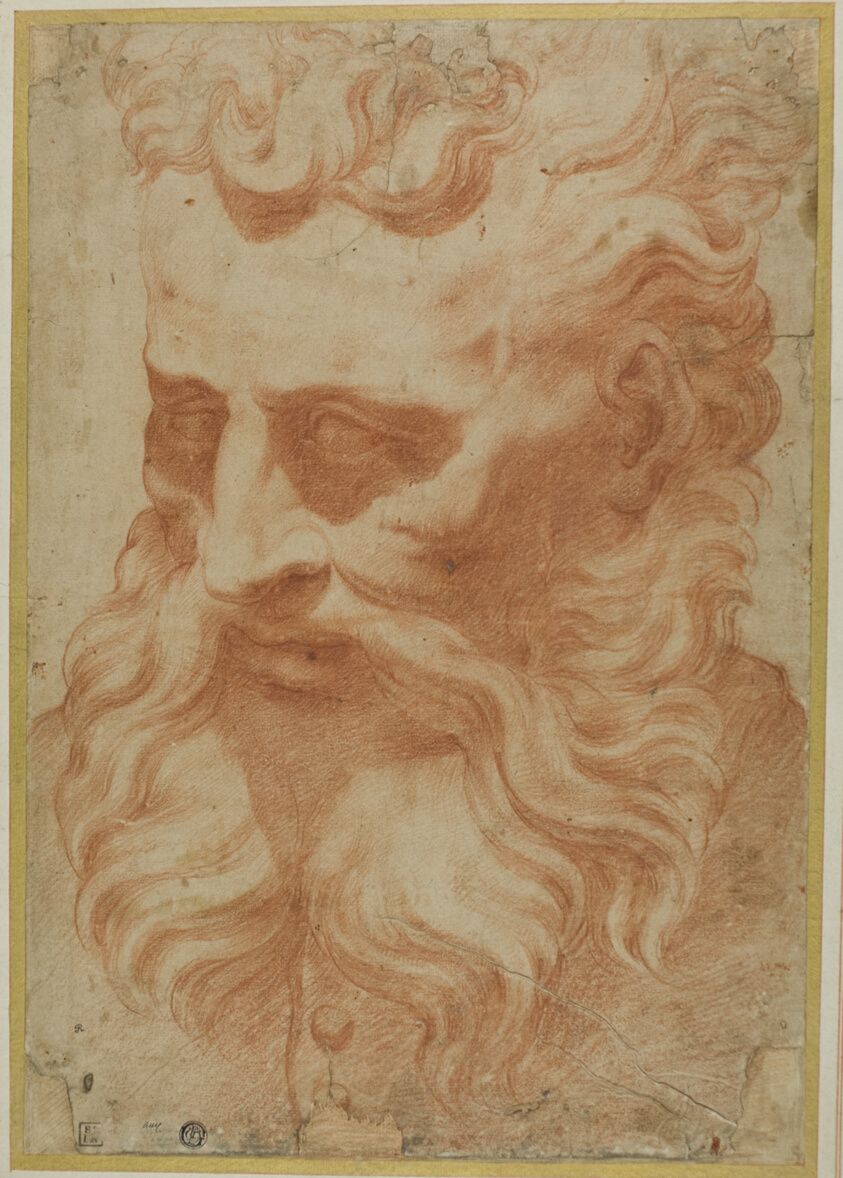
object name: Drawing and Watercolor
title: Death of Adonis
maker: Giulio Pippi, called Giulio Romano, after; Italian, c. 1499-1546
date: c. 1530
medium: Red chalk on cream wove transparentized paper (pieced together), laid down on cream laid paper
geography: Italy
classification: chalk; drawings (visual works); prints and drawing